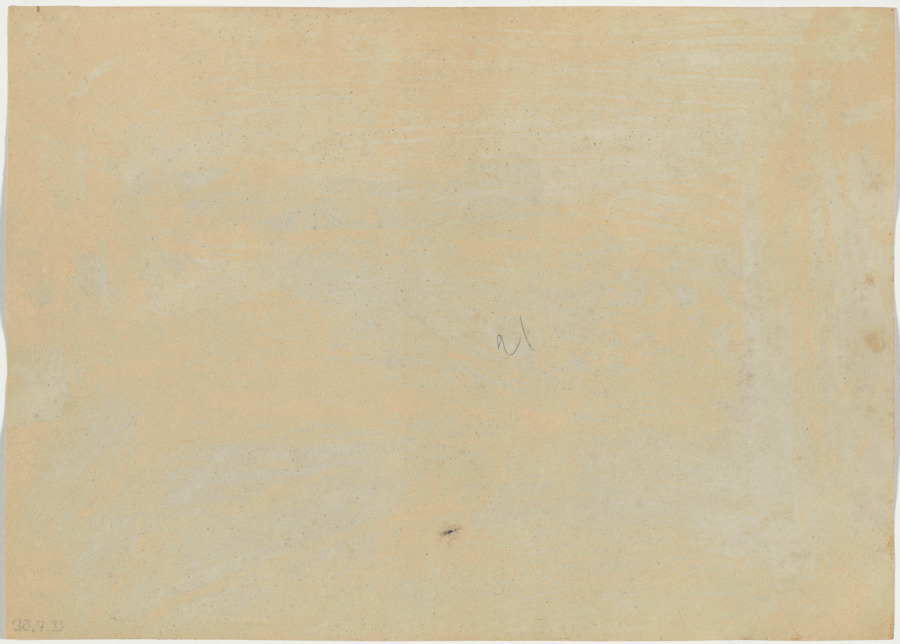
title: Jhansi Fort and Elephant Battery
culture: India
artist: Raja Deen Dayal (Indian, 1844–1905)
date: 1886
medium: albumen print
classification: Photograph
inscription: Imprinted in white in negative on recto: “2803” Stamped in black ink on verso: “36.7.D” Written in pencil on verso: “21 [?]”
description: Exercises involving elephant batteries, which were exotic to European eyes, attracted spectators; photographs of them were excellent souvenirs of these military forces employed by the British Indian Army. Elephants had been employed in warfare in India since at least the 500s BC, but with the advent of heavy artillery, their function switched from attack to support. They transported big guns and supplies and worked in logging and construction. It took many cattle to pull a load that could be handled by two elephants.